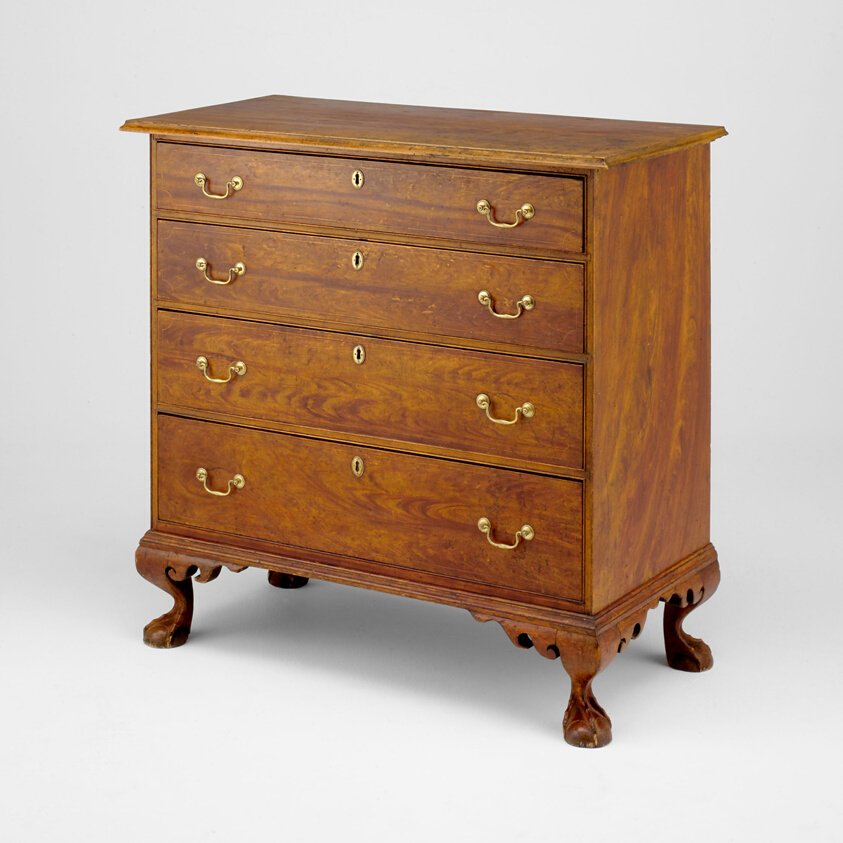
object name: Furniture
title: Chest of Drawers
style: Folk Art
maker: Attributed to John Dunlap (American, 1746–1792) and/or Samuel Dunlap (American, 1752–1830); Bedford, Henniker, or Salisbury, New Hampshire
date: 1780–1810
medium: Soft maple, eastern white pine, faux painted wood-grain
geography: New Hampshire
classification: furniture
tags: furniture